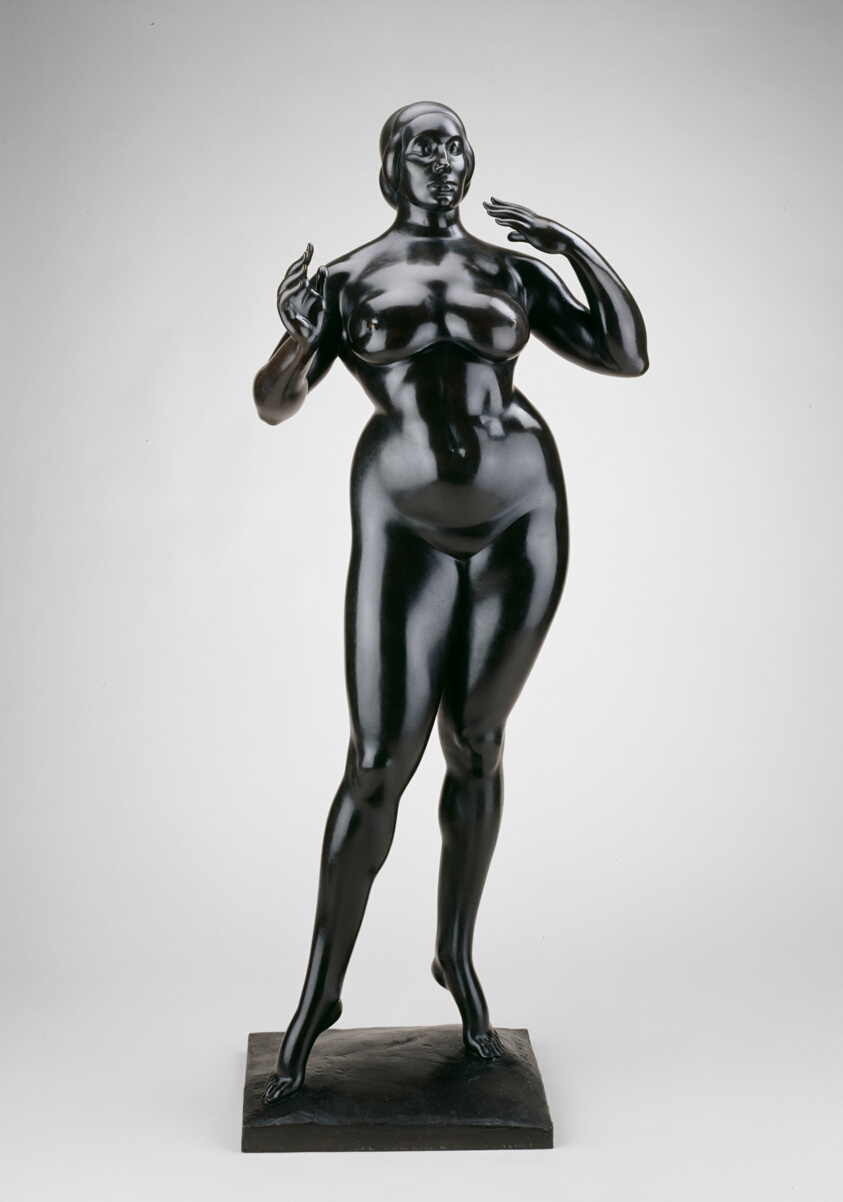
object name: Sculpture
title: Woman (Elevation)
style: Modernism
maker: Gaston Lachaise (American, born France, 1882–1935)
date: Modeled 1912–15, cast 1927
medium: Bronze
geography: United States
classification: bronze; metal; sculpture; modern and contemporary art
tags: people, portraits